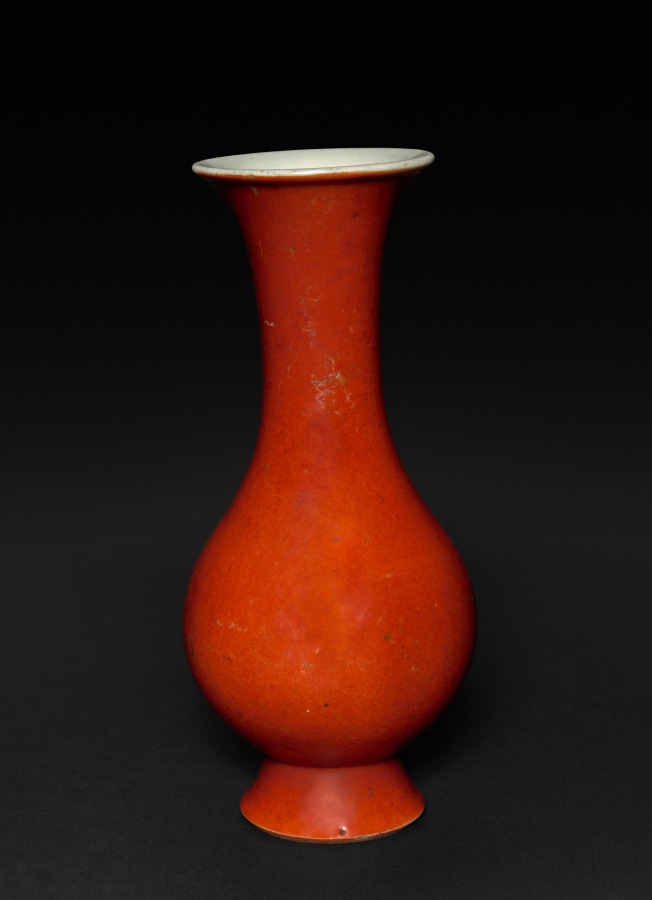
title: Vase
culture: China, Jiangxi Province, Jingdezhen kilns, Qing dynasty (1644–1911), Yongzheng reign (1722–35)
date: 1723–35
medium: porcelain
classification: Ceramic